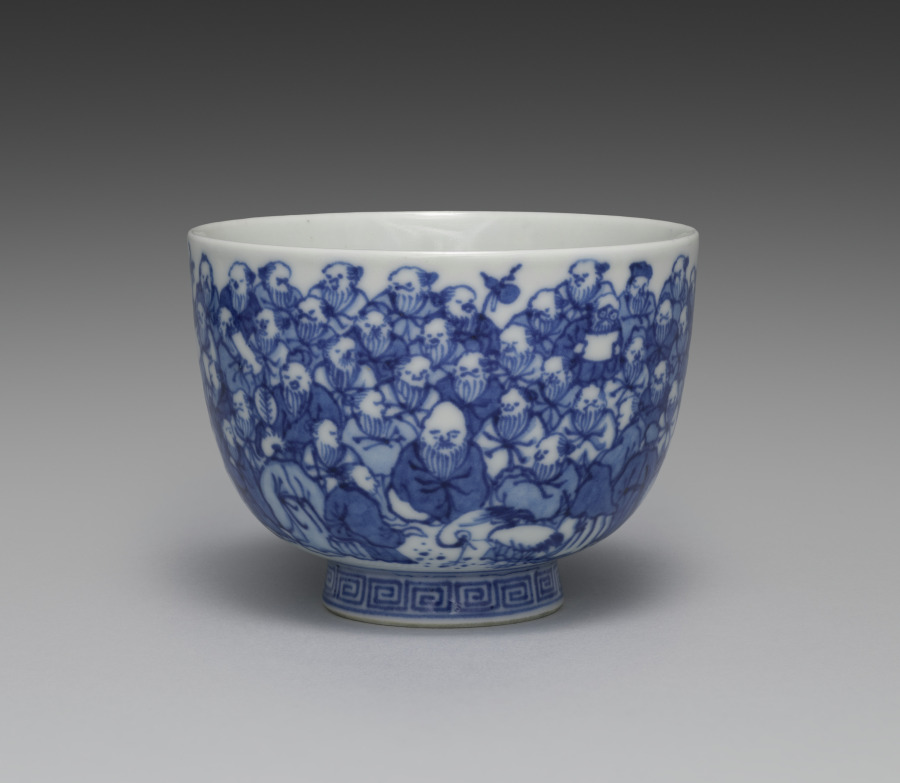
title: Teacup from Teacups with a Hundred Sages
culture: Japan, Meiji period (1868–1912)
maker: Seifū Yohei III (Japanese, 1851–1914)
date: 1893–1914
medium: One from a set of five teacups; porcelain with underglaze blue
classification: Ceramic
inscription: 清風造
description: Each of these five teacups has a painting of identical design in underglaze blue, but as the tiny figures are drawn entirely by hand, each cup has its own personality. The theme of the sencha cups is an assembly of sages or immortals, literally “a hundred venerable [people]” (hyakurō). The myriad figures crowd the scene in groups. The god of longevity, with his tall forehead, sits with his cranes, having flown in from Mt. Penglai on the Isle of the Immortals. Seven long-bearded sages sit around a stone table, chatting and drinking; one is seated on an enormous gourd. Of course, there is a stack of books on the table, and elsewhere, scrolls are being written upon or read—in one case held very close by a sage who is wearing glasses. The design was enormously popular in ceramics made for those engaged in literati culture.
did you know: Seifū Yohei III (1851–1914) produced many works for tea gatherings where people drank Chinese-style leaf-tea (sencha).